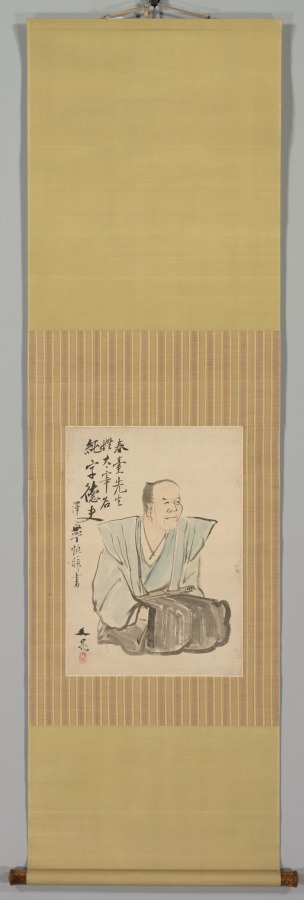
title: Imaginary Portrait of Shundai Dazai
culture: Japan, Edo period (1615–1868)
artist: Tani Bunchō (Japanese, 1763–1841)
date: late 1700s–1800s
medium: hanging scroll; ink and color on paper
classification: Painting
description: Shundai (1680–1747) was a noted Confucian scholar and writer. Brought up with a strongly Confucian family background, Bunchō’s veneration for Shundai is understandable. The inscription is by Nozawa Hikoroku, a scholar and poet contemporary with Bunchō.